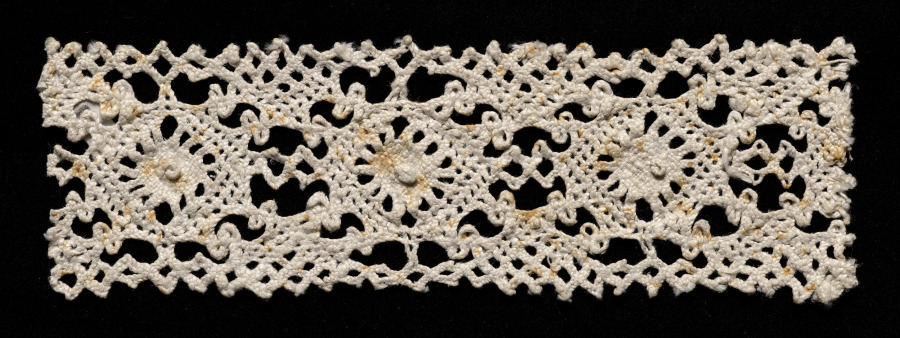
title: Lace Insertion (no selvage)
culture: Italy, Venice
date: 1540–60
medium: Bobbin lace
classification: Lace